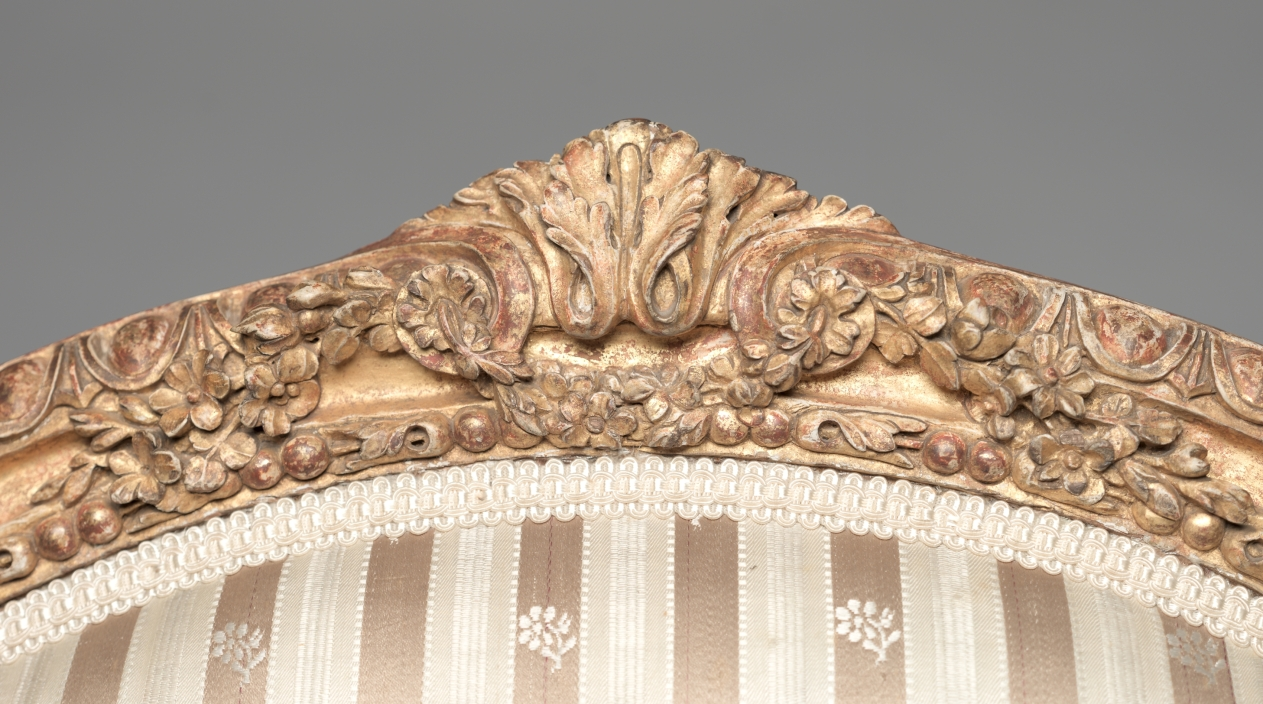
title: Armchair (Fauteuil) (2 of 2)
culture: France, 18th century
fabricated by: Jean-Baptiste II Tilliard (French, 1797)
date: c. 1765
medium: carved and gilded wood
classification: Furniture and woodwork